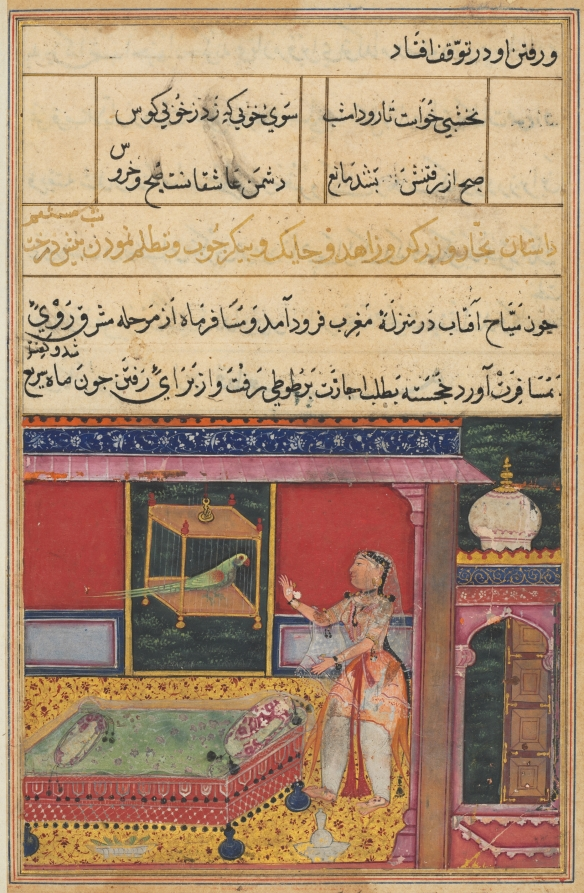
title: The Parrot Addresses Khujasta at the Beginning of the Sixth Night, from a Tuti-nama (Tales of a Parrot)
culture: Mughal India, court of Akbar (reigned 1556–1605)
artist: Dasavanta (Indian)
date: c. 1560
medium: gum tempera, ink, and gold on paper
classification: Painting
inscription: ['amal da]s[wa]nt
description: Tuti the parrot begins to tell Khujasta the story of seven men who became enamored with the statue of a woman that came to life. A Persian inscription in the lower margin attributes this page to the painter Dasavanta. The golden carpet and soft tufts of grass are similar to those found on folio 32v, also attributed to Dasavanta.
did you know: Dasavanta was a mural painter discovered by emperor Akbar, who had him trained in the royal atelier.